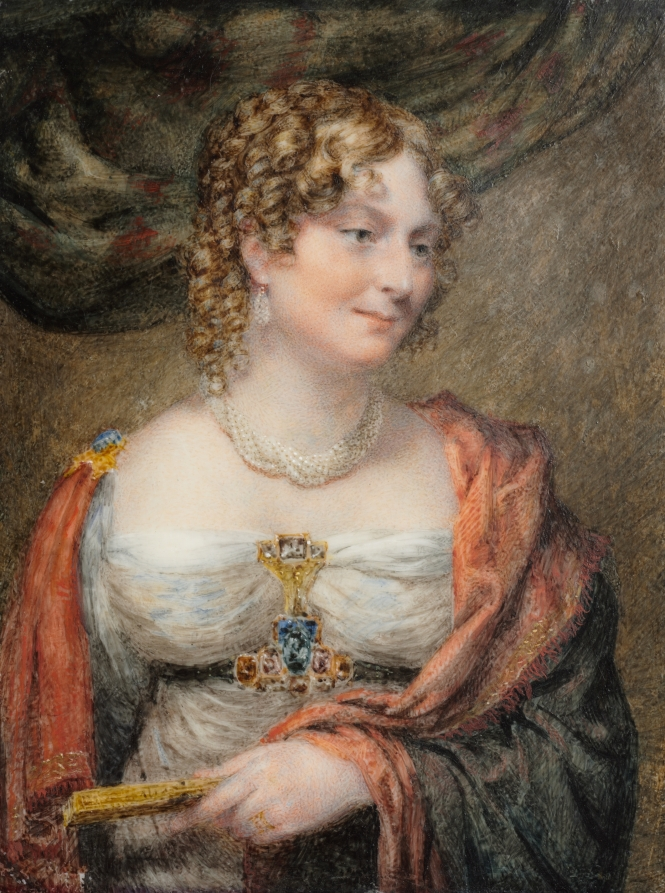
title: Portrait of Anne Law (née Towry), 1st Lady Ellenborough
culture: England, 19th century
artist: John Linnell (British, 1792–1882)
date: c. 1821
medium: watercolor on ivory heightened with gum arabic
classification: Portrait Miniature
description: John Linnell was born and lived much of his young adulthood in Bloomsbury, where his father, James, made picture frames and restored paintings. As a boy the artist trained briefly with Benjamin West (1738–1820) and John Varley (1778–1842) before becoming a student at the Royal Academy from 1805 to 1812. Though primarily known for his landscapes, Linnell was also a prolific portraitist and executed miniatures during the first two decades of his career, learning the medium from his neighbor James Holmes (1770–1860). According to an early biographer, Linnell began painting miniatures around 1818 with a portrait of his wife. By 1823 he had executed a number of miniature commissions from aristocratic patrons, including Princess Sophia, facilitated by the praise of the society maven Lady Stafford. He painted his last known miniature on ivory in 1832. During the approximately fifteen years that the artist painted miniatures, he consistently charged between 10 and 50 guineas for a portrait. These fees corresponded less to the size of the ivory than to the degree of finish and elaboration of the composition. In this portrait Anne Law (née Towry), 1st Lady Ellenborough (c. 1769–1843), is depicted half length. She wears a high-waisted white dress of translucent fabric through which a hint of blue appears and around which she wears a black belt. A devant de corsage (stomacher, or bodice brooch) is worn at her décolletage, extending to the belt. Its gold framework contains at least twelve semiprecious stones colored blue, red, aquamarine, pink, and brown. A gold brooch with a large blue stone is pinned to the cloak at her right shoulder. She also wears a twisted multistrand pearl necklace, matching pearl pendant earrings, and two gold rings on her left ring finger. A dark gray-green shawl with red reverse, gold border, and red fringe is draped over her shoulders and arms. She holds a closed fan in her left hand and stands against a brown background featuring a green and auburn striped curtain in the upper left corner. The sitter’s fair hair is dressed in ringlets that fall at her neck. The miniature is housed in a standing gilt metal and red velvet frame that dates from the same period.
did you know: Lady Ellenborough was described as “so exceedingly lovely, that passengers would linger to watch her watering the flowers—such was the fashion of the day—on the balcony of their house in Bloomsbury Square.”